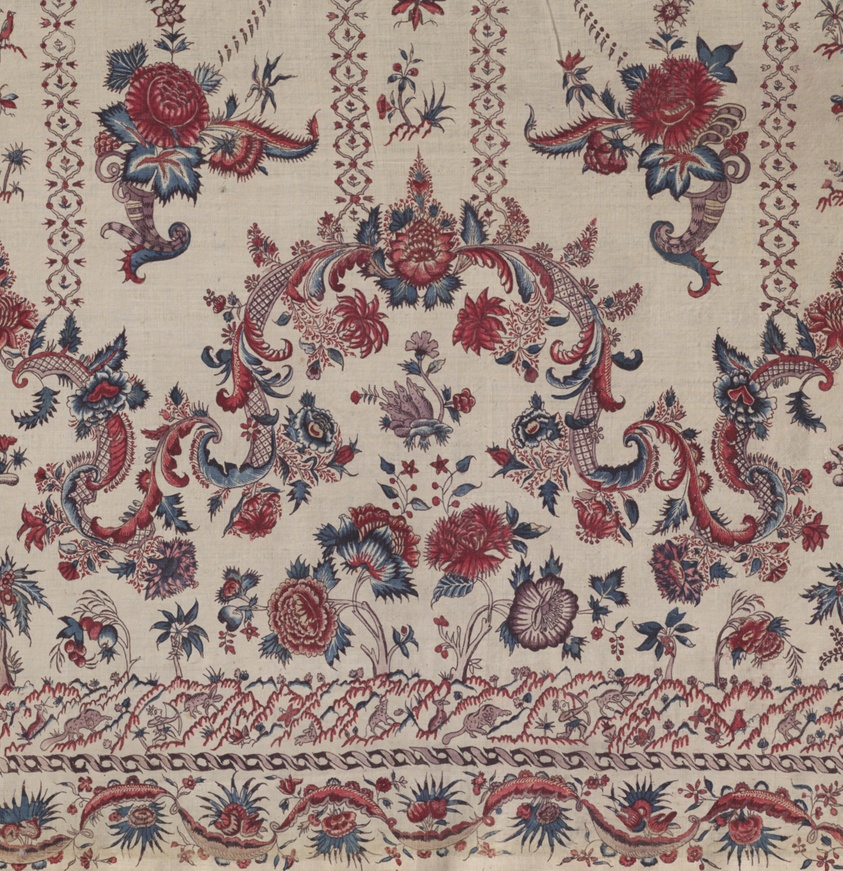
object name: Textile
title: Panel of Chintz for a Woman's Skirt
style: 18th Century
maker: Made in India possibly for the Dutch or Latin American market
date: 1730-50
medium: Cotton, plain weave; hand painted and dyed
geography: India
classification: textile; weaving - printed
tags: paisley, hunter, animals, floral, floral motifs, floral patterns, flowers, scrolls (motifs)